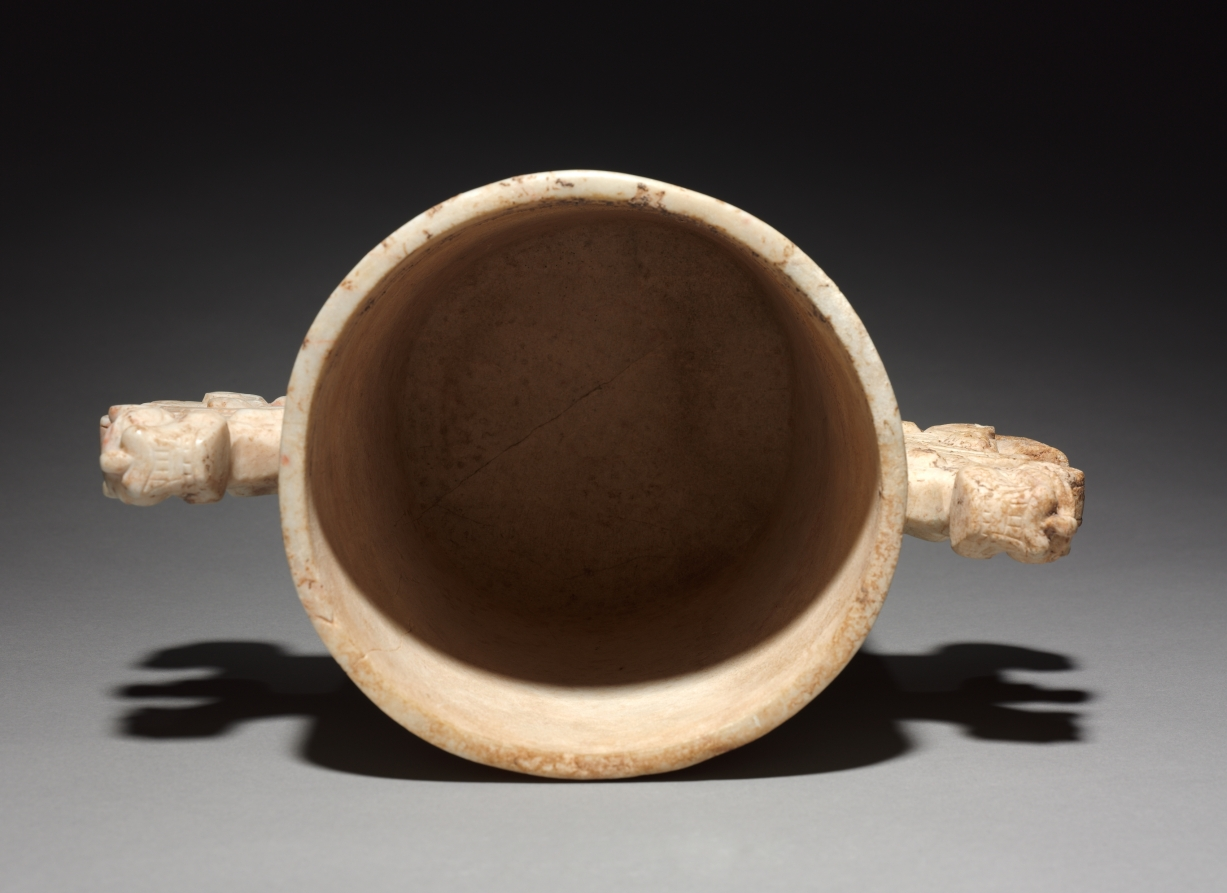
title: Carved Stone Vessel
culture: Northwest Honduras, Ulúa Valley, 8th-10th century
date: 700–1000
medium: marble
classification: Sculpture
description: This stone vessel, made by eastern neighbors of the Maya, is one of the finest and largest of its kind. On the exterior are several motifs that combine to create an unusually complex design that features a grotesque head, either in profile or front-facing, with a leg near its mouth. In the main panel a frontal version of the head hovers over two legs, the knees pointed sharply outward. Beside each leg is a lively human, rarely seen in such works. Little is known about the motifs’ meanings or the vessel’s use.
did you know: Carved in the round, the vessel's handles suggest a feline that emerges from a serpent-like head with an upturned snout.